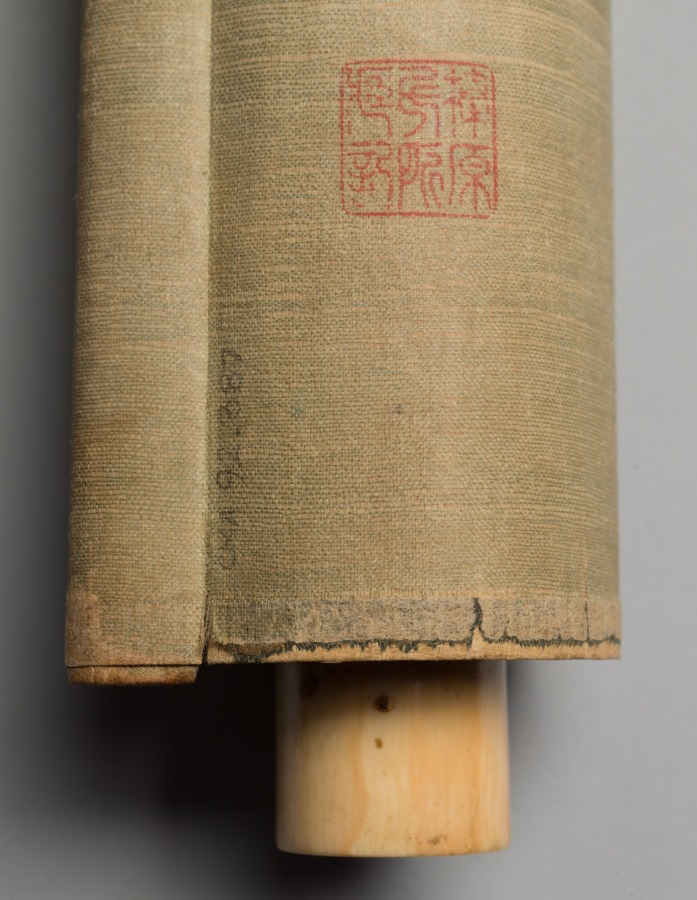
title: Immortal Riding on a Carp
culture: Japan, Edo period (1615–1868)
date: c. 1600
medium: hanging scroll; ink on paper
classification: Painting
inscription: seal of Motonobu ?